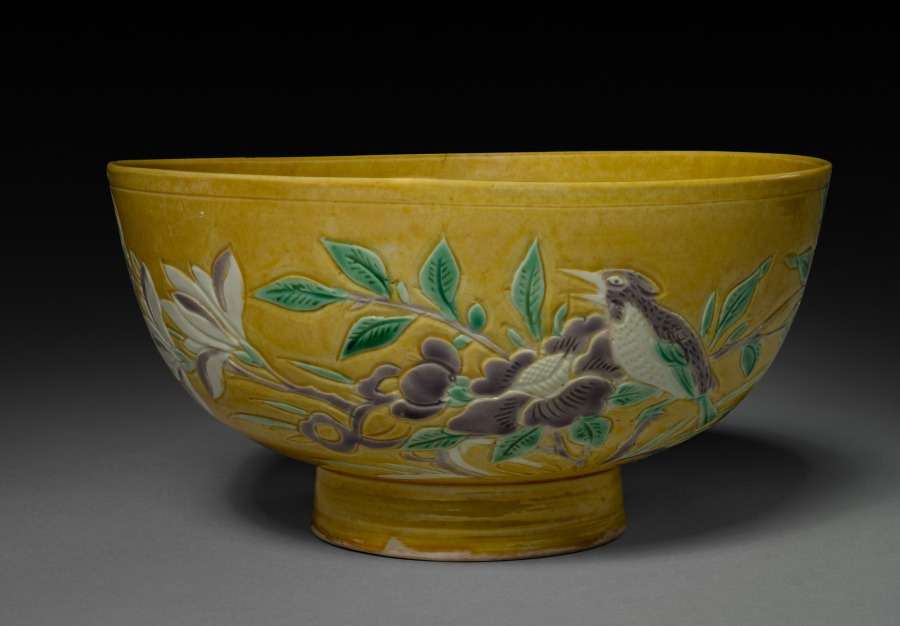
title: Bowl with Birds and Flowers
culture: China, Jiangxi province, Jingdezhen kilns, Qing dynasty (1644-1911), "Transitional Period," Shunzi period (1644-61)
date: 1644–61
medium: porcelain with incised and sancai (3-color) enamel decoration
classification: Ceramic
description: This porcelain bowl is considered to have been made in the "Transitional period," a term used to define the period between about 1620 and 1683 when official kilns in Jingdezhen were no longer under imperial supervision due to the transition from the Ming to the Qing dynasties.